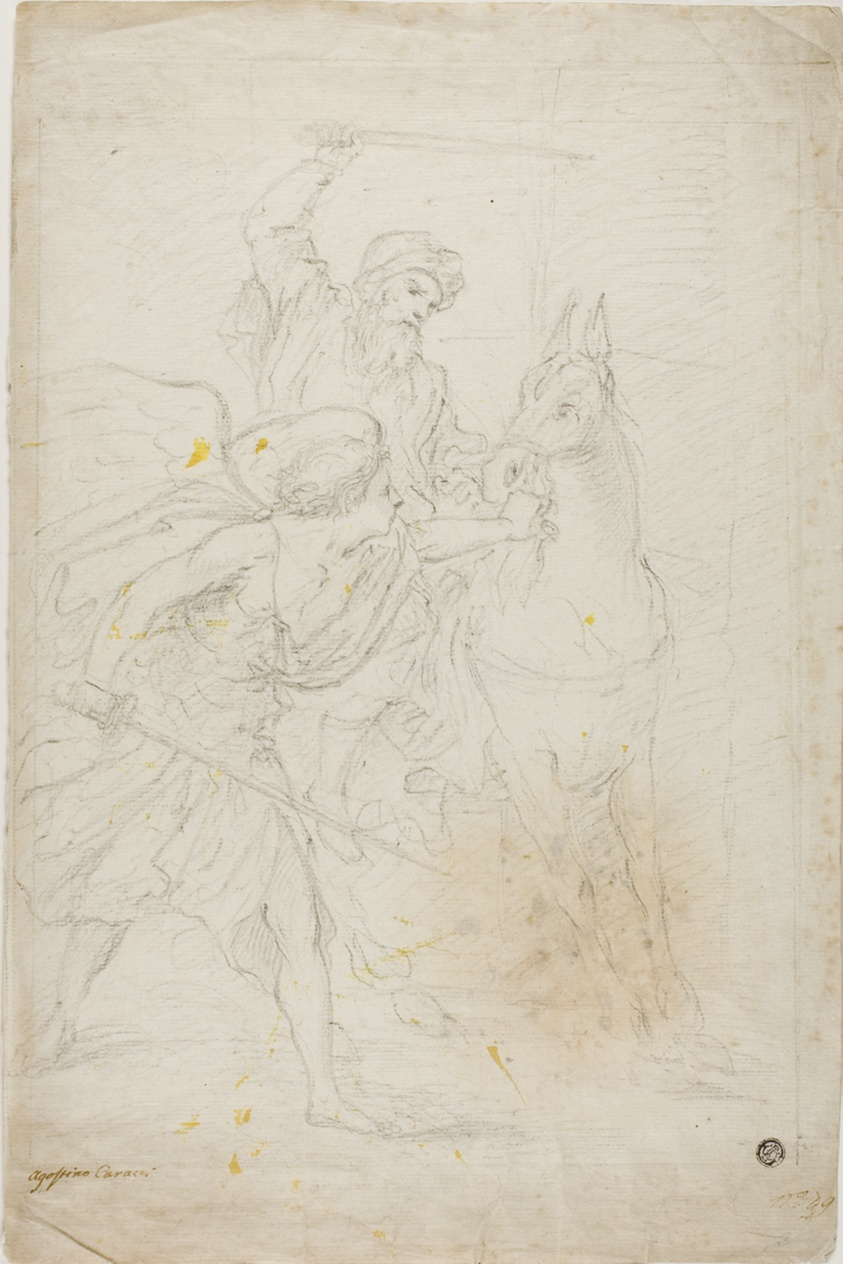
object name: Drawing and Watercolor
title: Balaam's Ass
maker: Agostino Carracci (Italian, 1557-1602)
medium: Black chalk on ivory laid paper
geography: Italy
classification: chalk; paper; drawings (visual works); prints and drawing